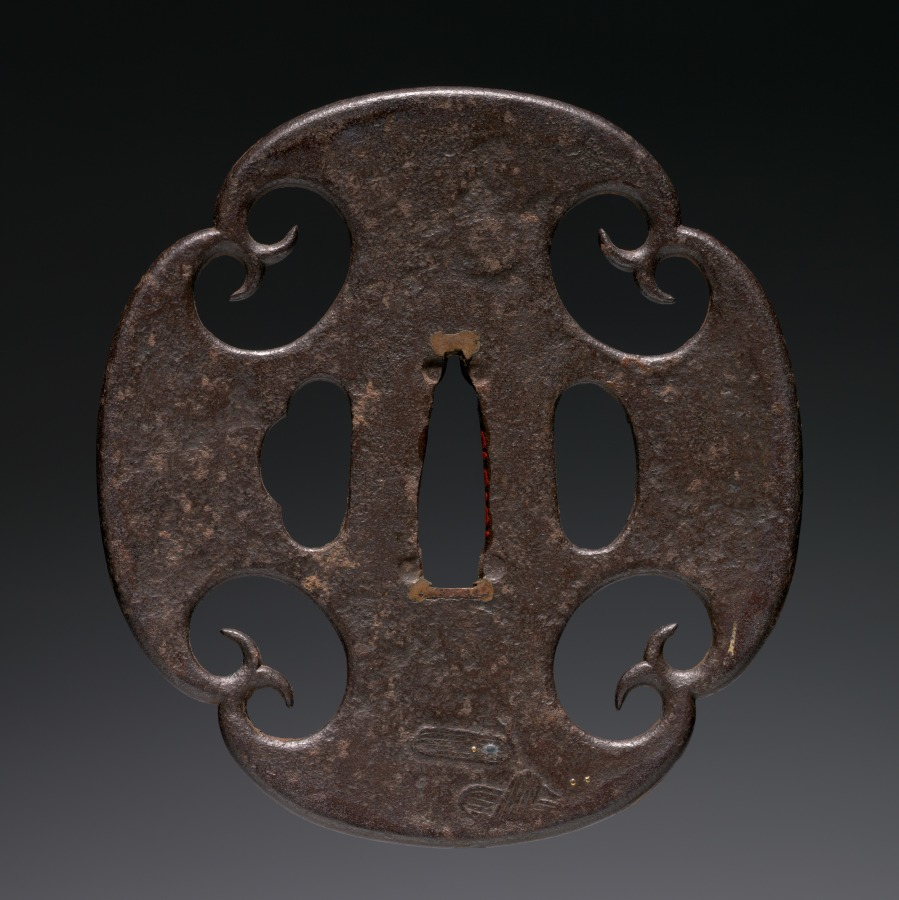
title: Sword Guard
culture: Japan, Edo period (1615–1868)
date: 1600s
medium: iron (Kaneie type)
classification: Arms and Armor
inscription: signed "Kaneiye, residing at Fushimi, Yamashiro province."